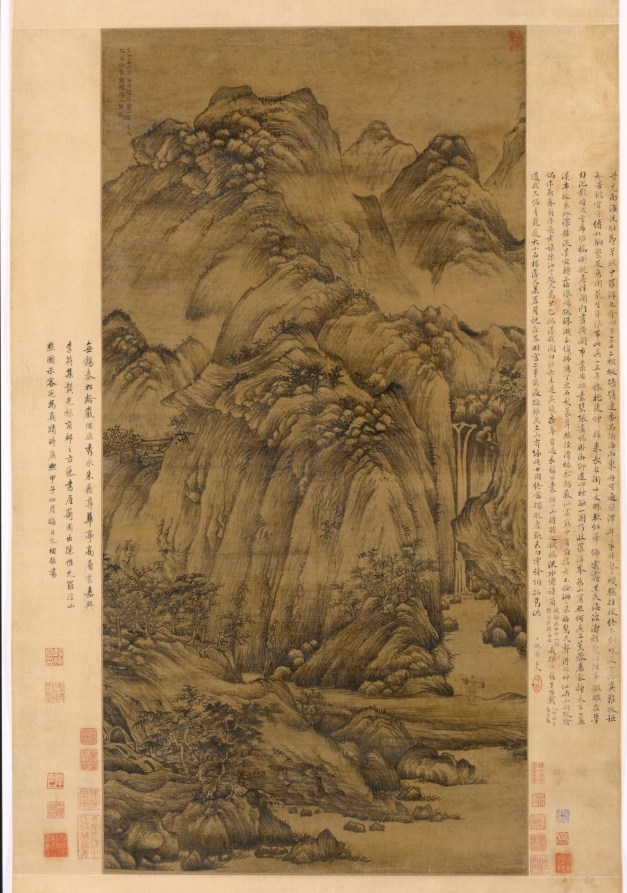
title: The Woodcutter of Luofu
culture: China, Yuan dynasty (1271-1368)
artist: Chen Ruyan (Chinese, c. 1331–1371)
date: 1366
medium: Hanging scroll; ink on silk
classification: Painting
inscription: 至正二十六年（1366）正月望後廬山汝言為思齊斷事寫羅浮山樵圖。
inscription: 2 colophons and 18 additional seals: 5 seals of Wang Shimin 王時敏 (1592–1680); 2 seals of Gong Xianglin 龔翔麟 (1658–1733); 1 colophon, dated 1684, of Yan Shengsun 嚴繩孫 (1623–1702); 1 colophon and 1 seal of Huang Ren (1683–1768); 2 seals of Lu Shusheng 陸樹聲 (3rd son of Lu Xinyuan 陸心源); 2 seals of T'ao Kuang; 1 seal of Tan Jing 譚敬 (20th c.); 3 seals of Zhang Heng 張珩 (1915–1963); 2 seals unidentified.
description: This landscape illustrates the traditionalism of Chinese painting: while the brush manner is novel, the composition is based on early Song dynasty (960-1127) models. The soft raveling brushstrokes and lumpy rock shapes are characteristic of the new 14th-century stylistic expression.